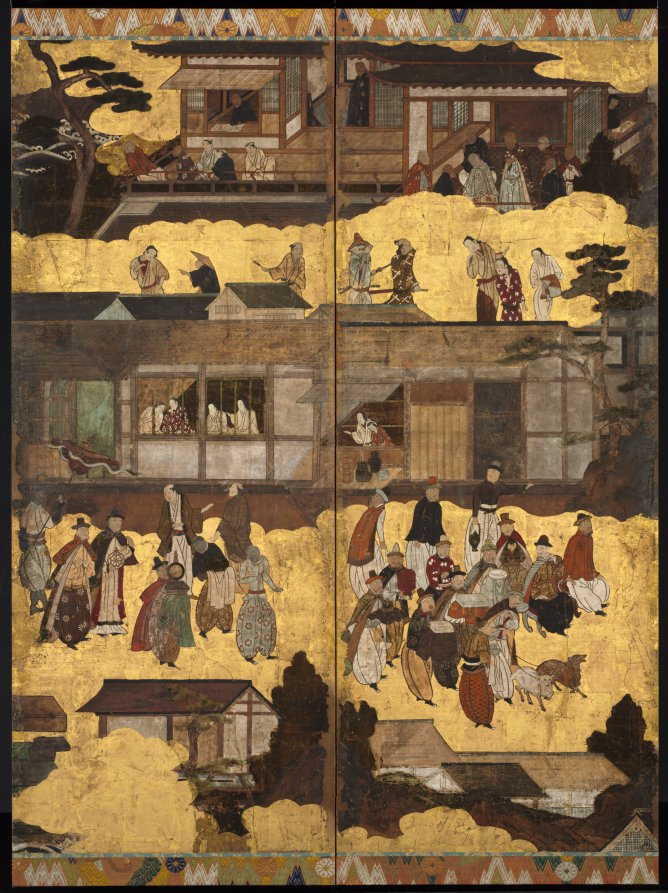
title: Arrival of the "Southern Barbarians"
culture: Japan, Momoyama period (1573–1615)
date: c. 1600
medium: One of a pair of six-panel folding screens; ink, color, and gold on paper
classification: Painting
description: This screen and its corresponding screen show Portuguese merchants arriving in Japan, having crossed the oceans in their large ship with a multinational crew. The Portuguese were known in Japan as the “Southern Barbarians” because they arrived from the south and their customs and manners were unfamiliar to the Japanese, who had not encountered anyone from Europe until their first appearance in 1543. In 1639, the Portuguese were forced out of Japan, mainly owing to internal difficulties caused by their Catholic missionaries, but they were a major conduit for both objects and ideas from Europe for nearly 100 years.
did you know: Europeans were called "Southern Barbarians" because their ships arrived in Japan from the south.